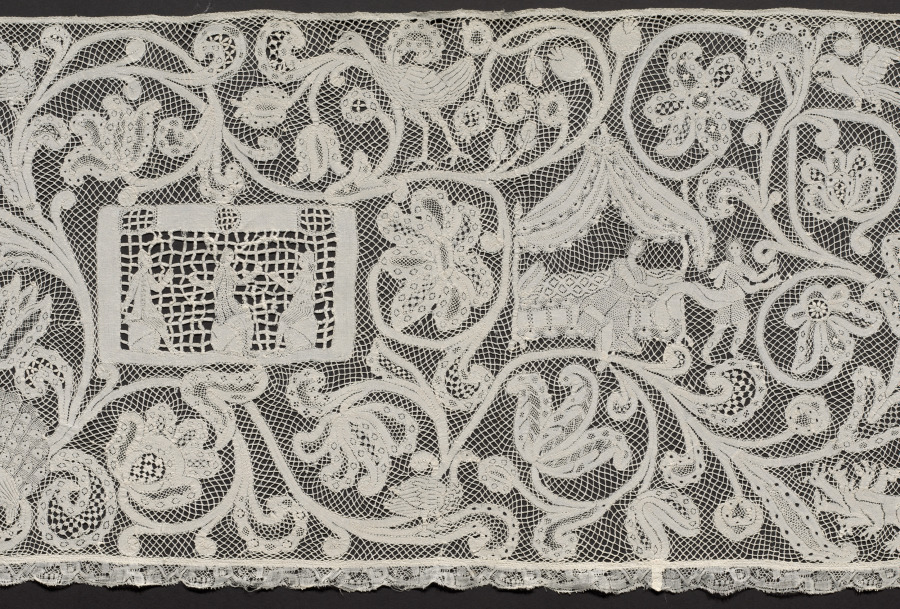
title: Lace Flounce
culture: Italy, Milan(?)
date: 1750–99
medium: Linen: bobbin lace (Punto di Milano)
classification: Lace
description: Being the most prestigious material, lace was used extensively by the 1600s for altar linen and for trimming priest’s albs, often incorporating finely rendered religious images amid blossoming vines. This alb flounce depicts scenes from the Old Testament story of Joseph, whose jealous brothers sold him to a caravan bound for Egypt. Joseph later interpreted dreams of the pharaoh, who made him ruler. When famine in Canaan caused Joseph’s ten brothers to travel to Egypt in search of food, they bowed down to him. After he revealed his identity, he forgave his brothers and God saved the family.